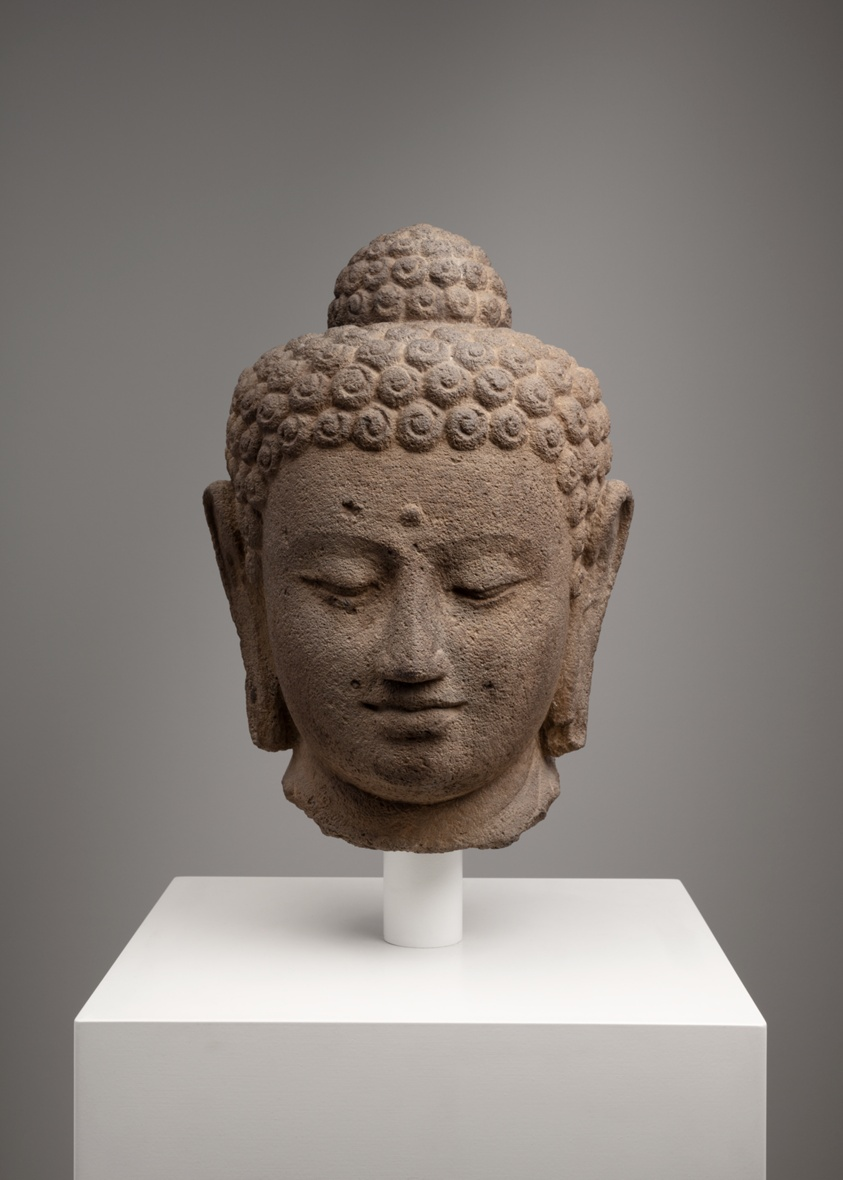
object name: Sculpture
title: Head of Buddha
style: Southeast Asian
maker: Indonesia; Central Java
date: 9th century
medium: Andesite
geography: Central Java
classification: stone; sculpture; asian art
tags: Buddha